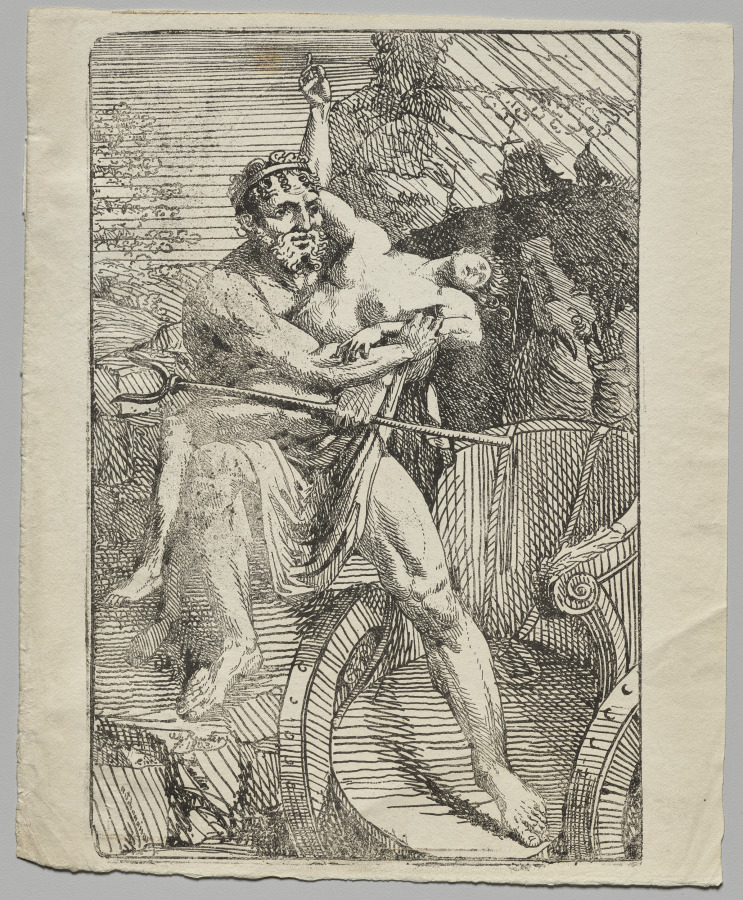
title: The Abduction of Proserpina by Pluto (2nd version)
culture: Germany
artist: Friedrich Wilhelm Reuter (German, 1768–1834)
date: 1803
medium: Pen lithograph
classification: Print